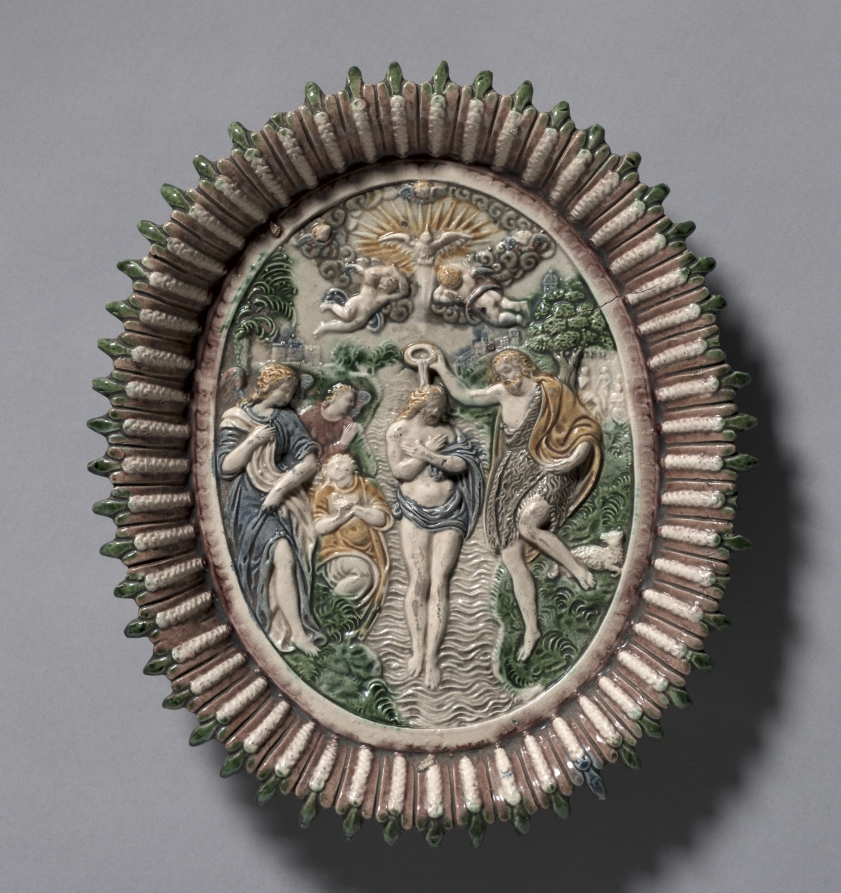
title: Plate Depicting the Baptism of Christ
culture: France, 16th century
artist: circle of Bernard Palissy (French, 1510–1589)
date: late 1500s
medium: earthenware with lead glaze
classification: Ceramic